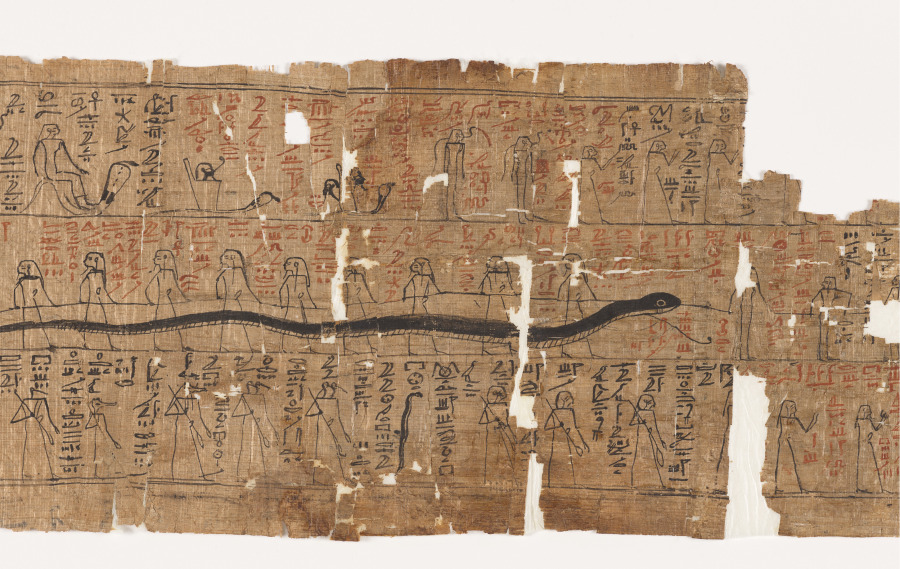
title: Book of Amduat, Perhaps of Bakenmut, with Elements of the Tenth through Twelfth Hours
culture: Egypt, Third Intermediate (1069–715 BCE), Dynasties 21–22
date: 1000–900 BCE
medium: papyrus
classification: Funerary Equipment